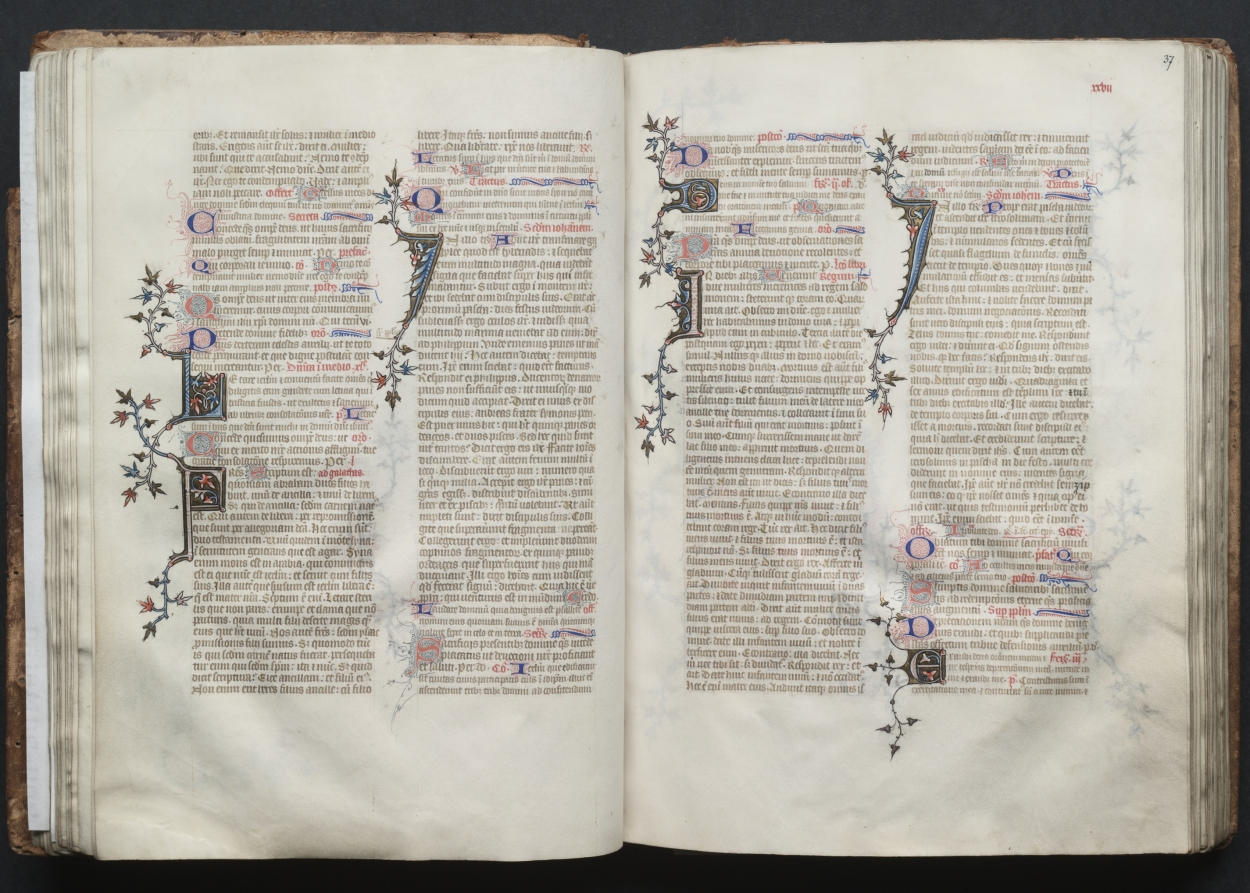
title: The Gotha Missal: Fol. 37r, Text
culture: France, Paris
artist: Master of the Boqueteaux (French)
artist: and Workshop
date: c. 1375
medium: ink, tempera, and gold on vellum; blind-tooled leather binding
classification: Bound Volume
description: The style and quality of this manuscript's decoration is typical of deluxe Parisian books made for aristocratic or royal patrons. Most of the book's decoration appears to be the work of the Master of the Boqueteaux, an artist active at the court of King Charles V (died 1380). His style was apparently shared by a number of book illuminators working in and around Paris. It is very possible that the Gotha Missal belonged to Charles V, but is not provable because the manuscript has no royal portraits and lacks a colophon. Given the book's magnificent decoration, however, it would seem that it was produced for a Valois prince, if not for the king himself. The manuscript receives its name from the German dukes of Gotha, its later owners.